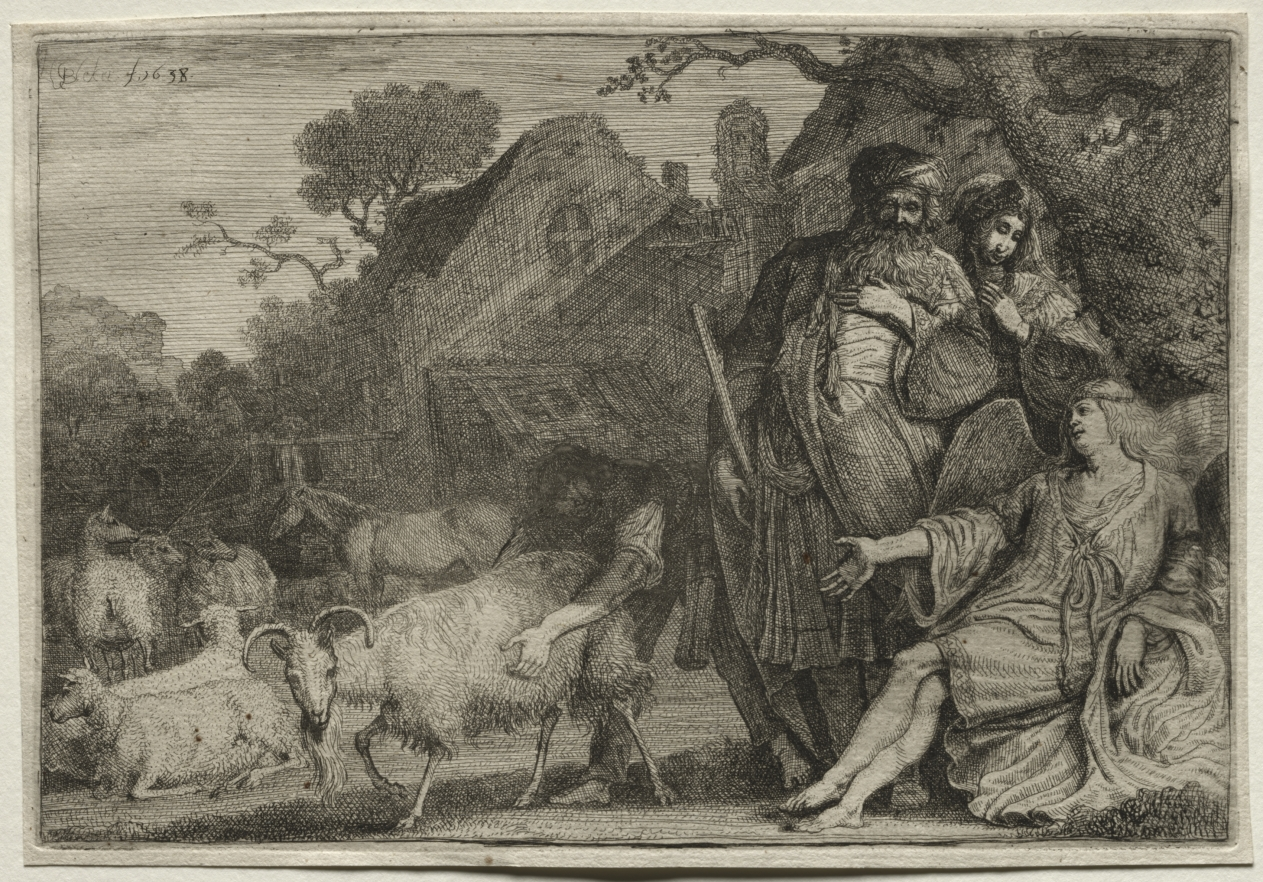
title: An Angel Foretells the Birth of Abraham's Son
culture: Netherlands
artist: Gerrit Claesz. Bleker (Dutch, 1656)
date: 1638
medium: etching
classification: Print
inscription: upper left, in plate: GBleker f.1638. ; VERSO, lower left, in graphite: 1125 ; lower left, in graphite: [f M.ar ?] (underlined) / [f vr ?] ; lower left, in graphite: B.293 ; lower center, in graphite: Bleker B.1; lower right, in graphite: EW